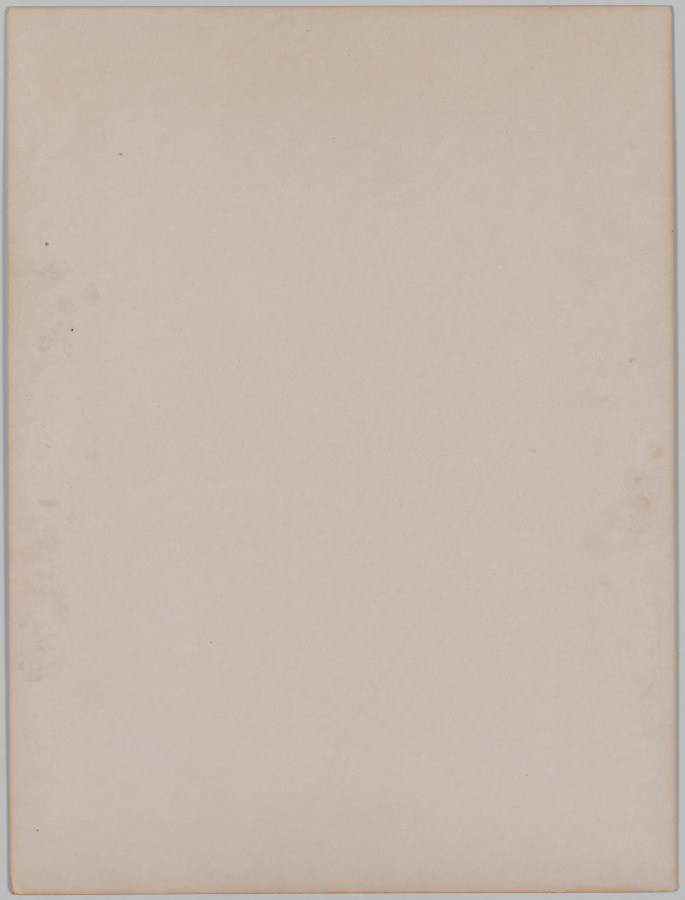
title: The Steerage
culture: America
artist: Alfred Stieglitz (American, 1864–1946)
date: 1907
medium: photogravure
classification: Photograph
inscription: Written in pencil on recto of mount in lower left: “The Steerage-1907/original Photogravure/Alfred Stieglitz (signed)”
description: With his camera, Stieglitz transformed a scene of impoverished immigrants returning to Europe into a study in shape and form; the image sparked his evolution from a pictorialist into a modernist. Reflecting on his career in 1942, Stieglitz proclaimed this image, taken in 1907, as an achievement of modern art that anticipated Cubism.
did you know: This print is Alfred Stieglitz’s own, lifelong copy of The Steerage, one of his most important works.